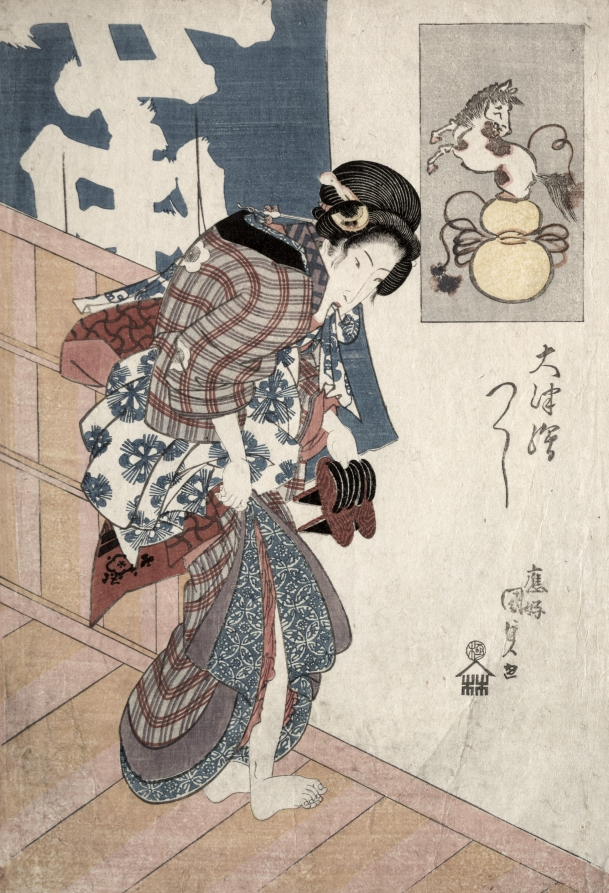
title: Woman Leaving a Bath House (from the series Pictures from Otsu)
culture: Japan, Edo period (1615–1868)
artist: Utagawa Kunisada (Japanese, 1786–1865)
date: c. mid 1820s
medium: color woodblock print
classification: Print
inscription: Signature: Oko (konomi ni ojite) Kunisada ga Publisher: Iseya Rihei (emblem) Censorship Seal: kiwame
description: The image of a horse emerging from a gourd in the upper-right corner alludes to the story of the Daoist immortal Chokaro. It was a popular subject of otsu-e folk paintings.